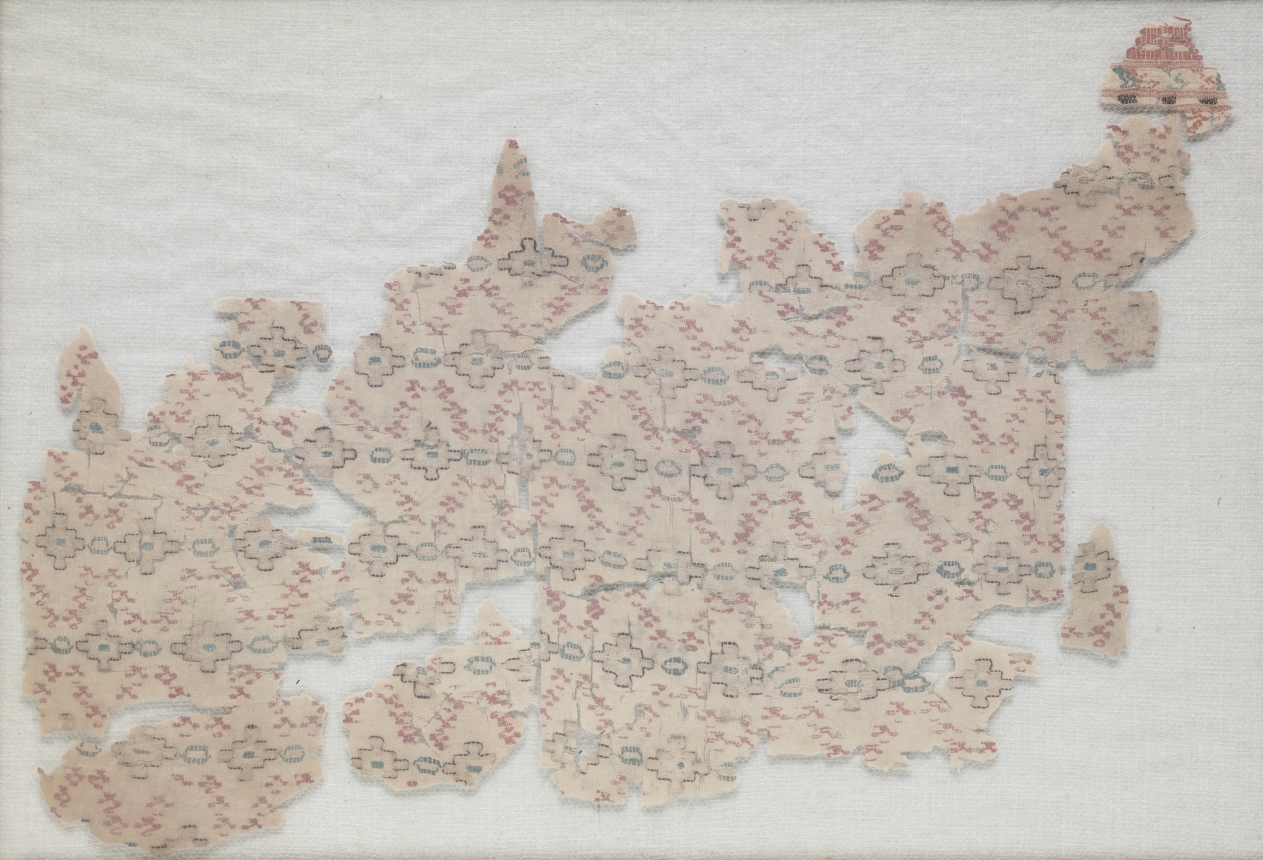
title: Fragment with diamond pattern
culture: Iraq, probably Baghdad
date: 800s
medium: plain weave, brocaded: silk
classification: Textile